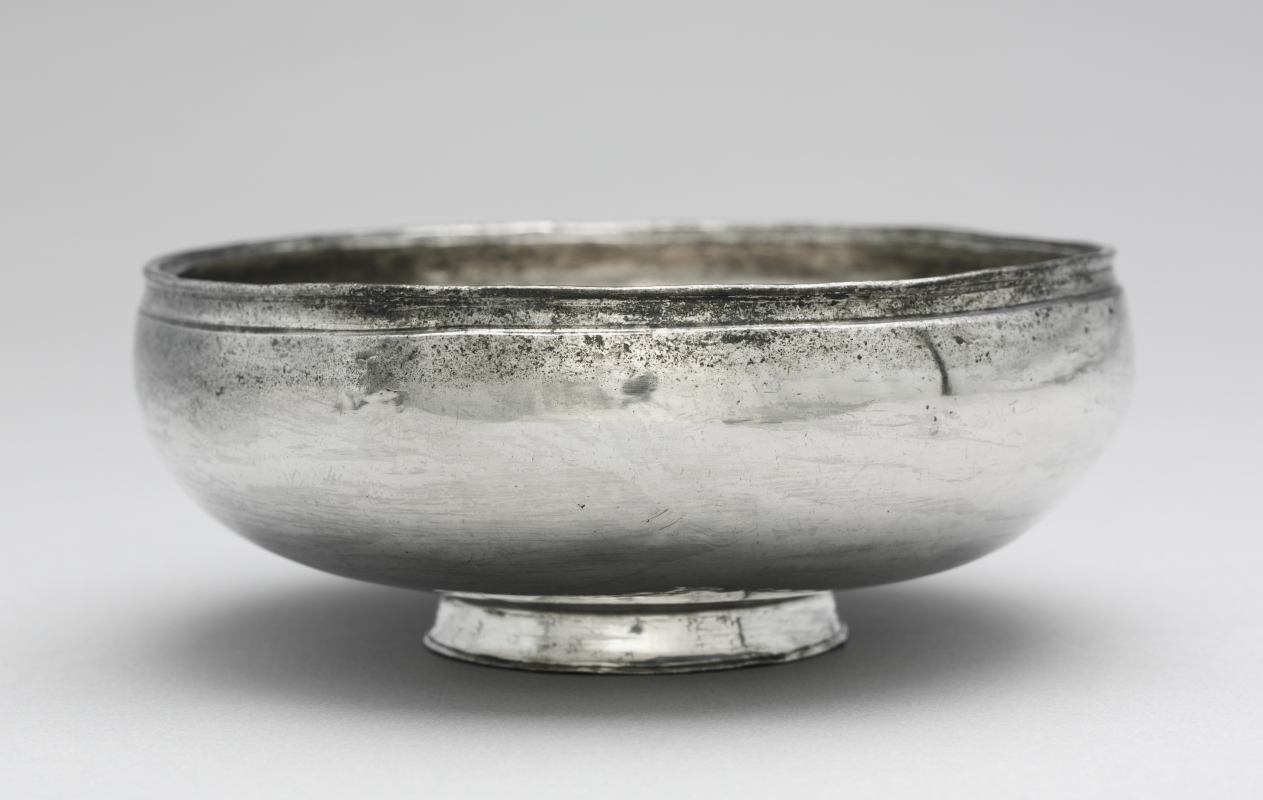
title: Bowl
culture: Byzantium, Syria(?), Byzantine period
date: 350–450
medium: silver with niello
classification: Metalwork